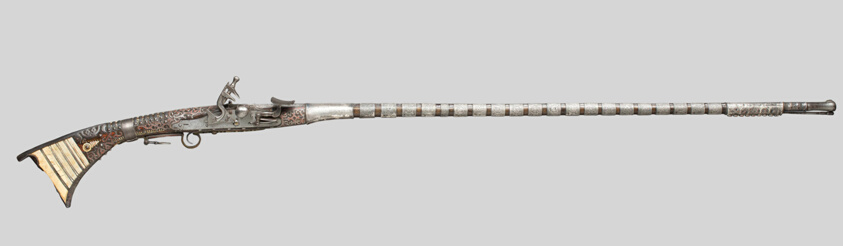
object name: Arms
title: Snaphance Gun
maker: North African, Moroccan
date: 19th century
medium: Wood, steel, silver, enamel, and bone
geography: Morocco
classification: firearm-long gun; arms; arms and armor